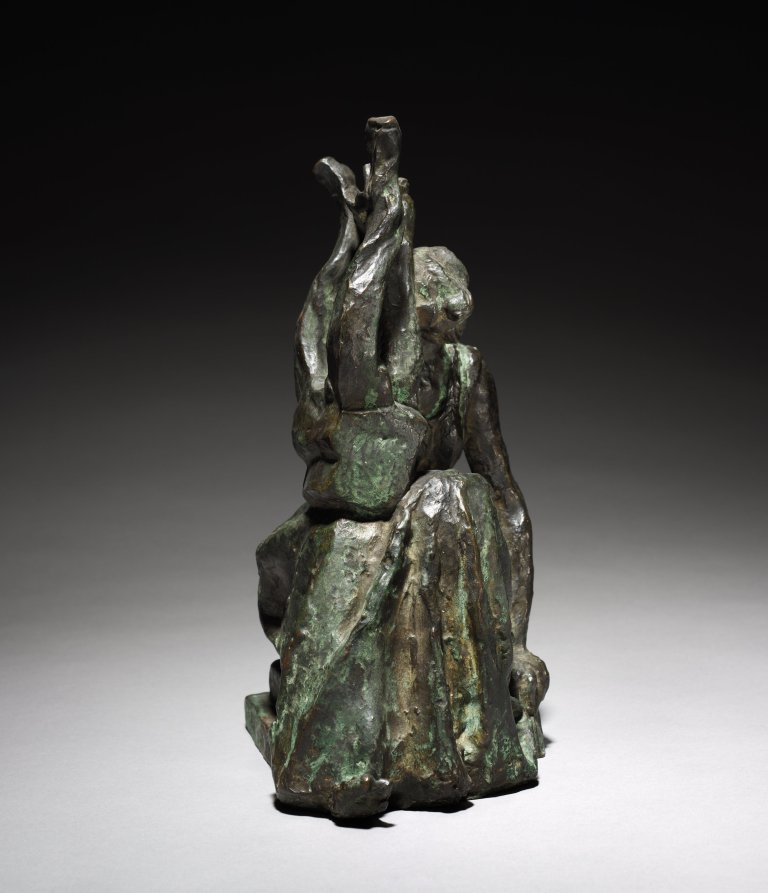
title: Sappho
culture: France, 19th century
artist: Emile Antoine Bourdelle (French, 1861–1929)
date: 1887–1925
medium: bronze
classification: Sculpture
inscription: Inscribed on back: "Alexis Rudier, Fondeur, Paris"; on right side: "E. A. Bourdelle"